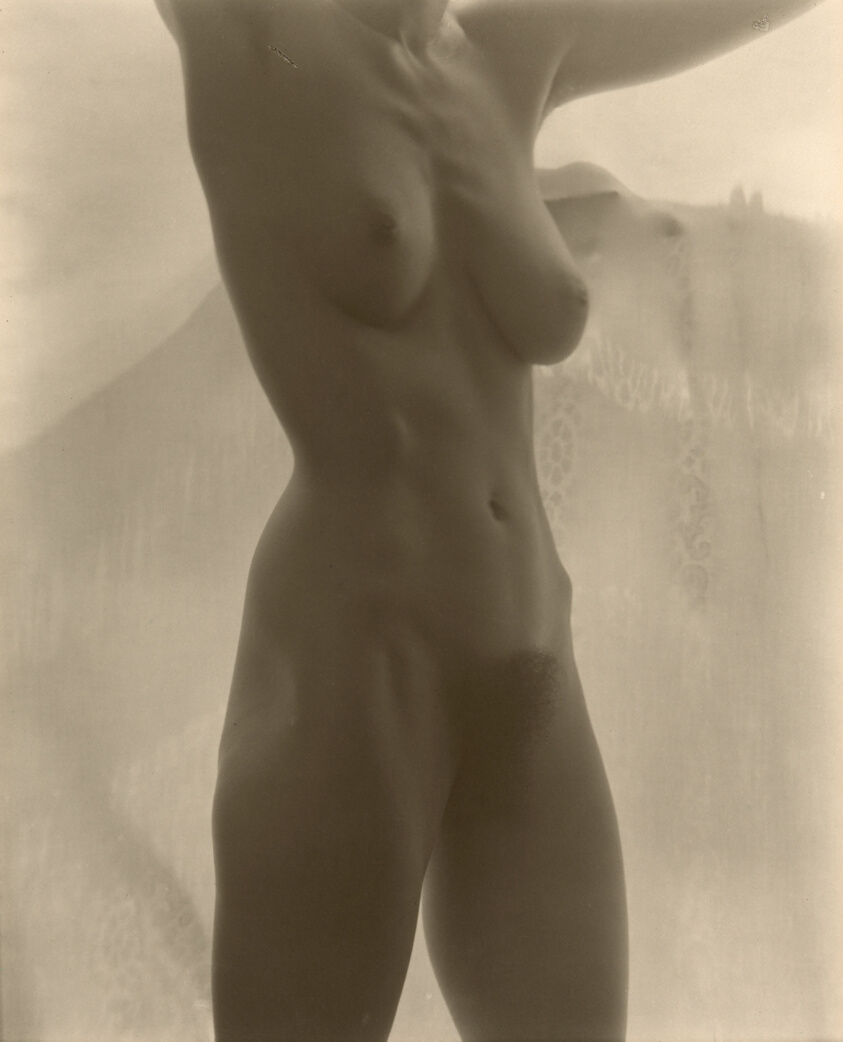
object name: Photograph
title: Georgia O'Keeffe—Torso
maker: Alfred Stieglitz (American, 1864–1946)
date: 1918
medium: Gelatin silver print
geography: United States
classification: gelatin silver (developing-out-paper) pr; photographic process; photography; photograph